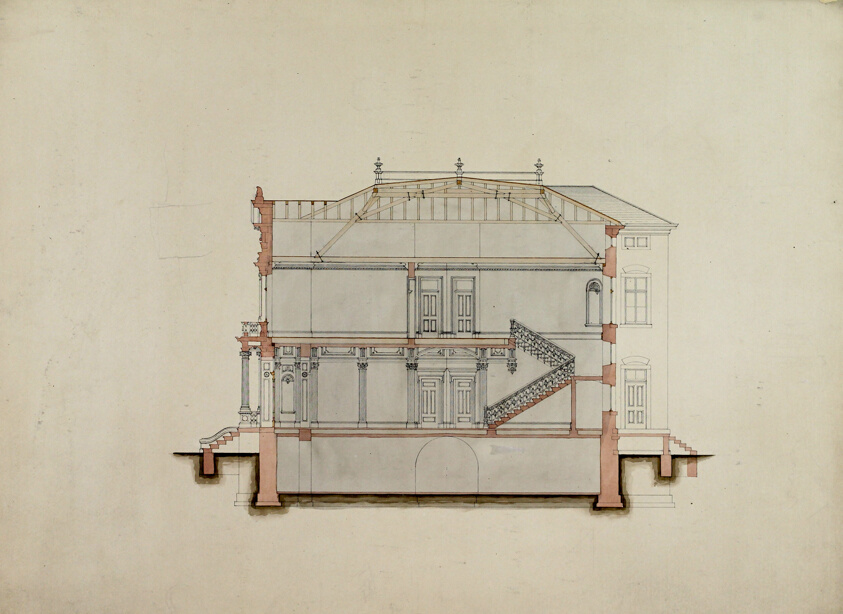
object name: Architectural Drawing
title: Design Studies, Section Through House, Presentation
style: 19th century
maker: Carl (Charles) J. Furst (American, born Germany c. 1840–c. 1919)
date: c. 1860–1870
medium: Ink and watercolor on drawing paper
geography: United States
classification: presentation drawing; architectural detail; architecture; design; drawings (visual works); architectural drawing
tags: houses, presentation, residential, homes, architecture, interior design, design